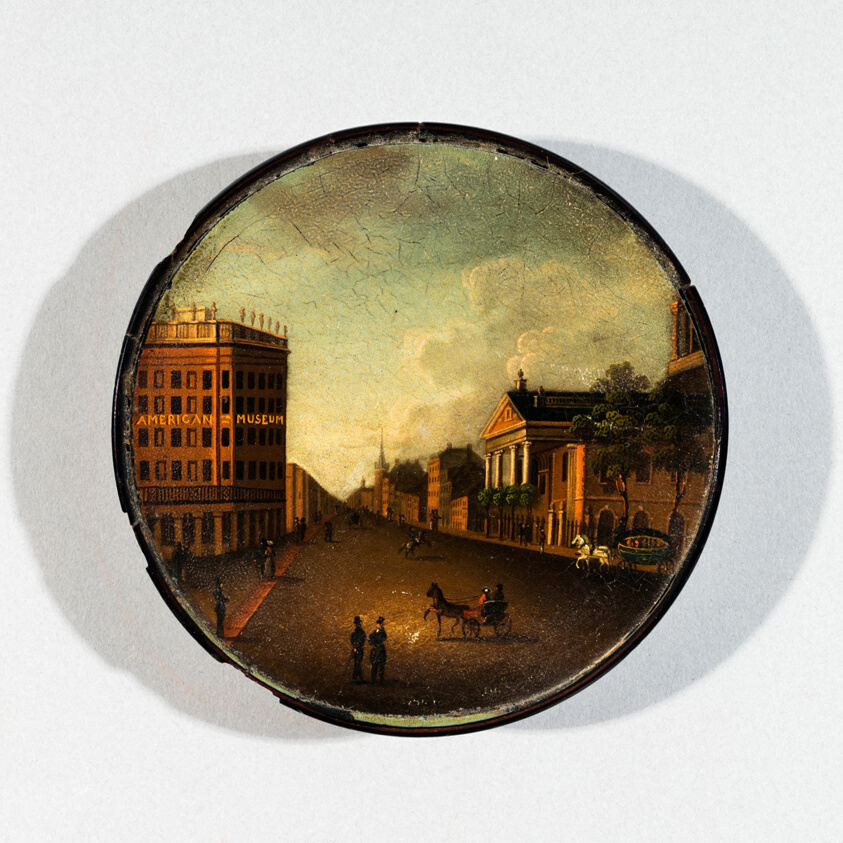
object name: Decorative Arts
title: Box with painted lid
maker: Hudson River School (American, mid 19th cen.)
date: 19th century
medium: Papier-mâché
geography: United States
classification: miniature painting; box; american decorative arts; american arts; decorative arts